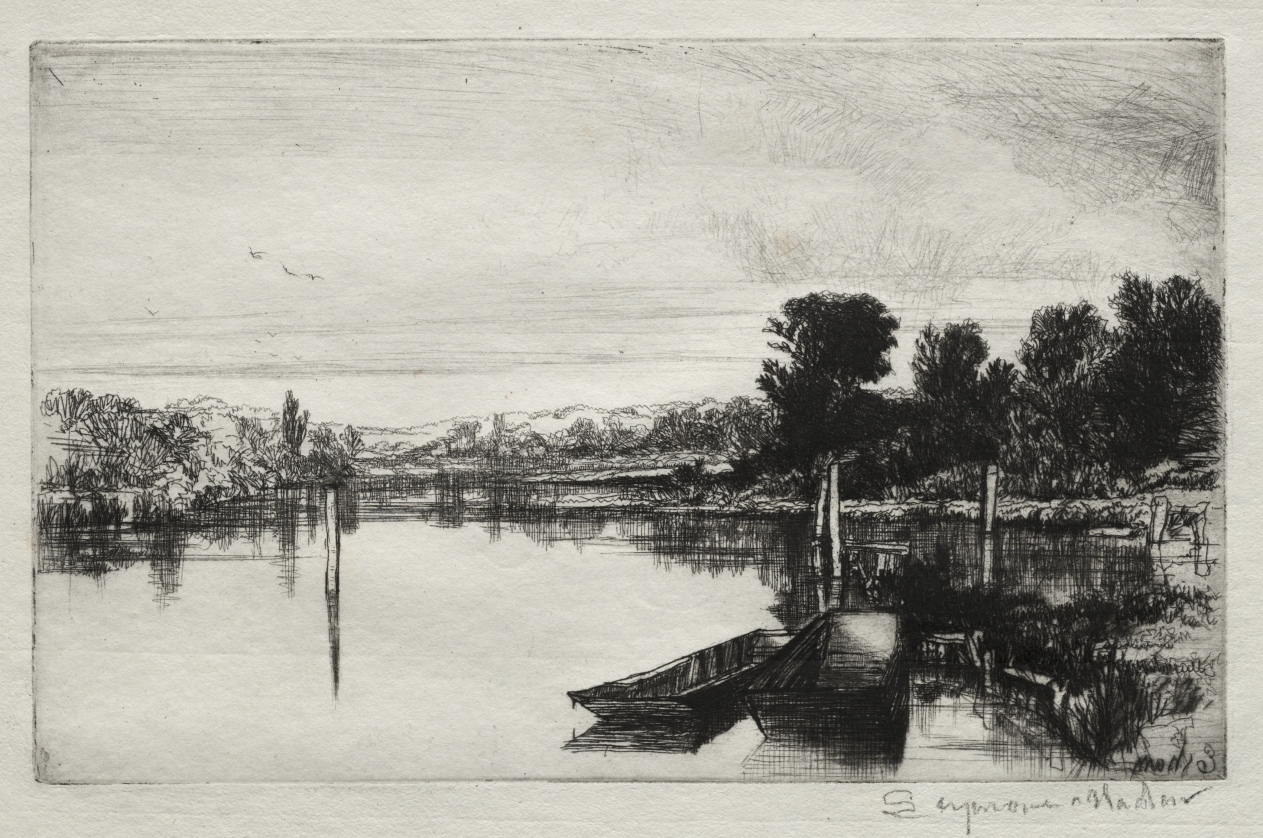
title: Egham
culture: England, 19th century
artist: Francis Seymour Haden (British, 1818–1910)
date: 1859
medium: etching and drypoint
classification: Print